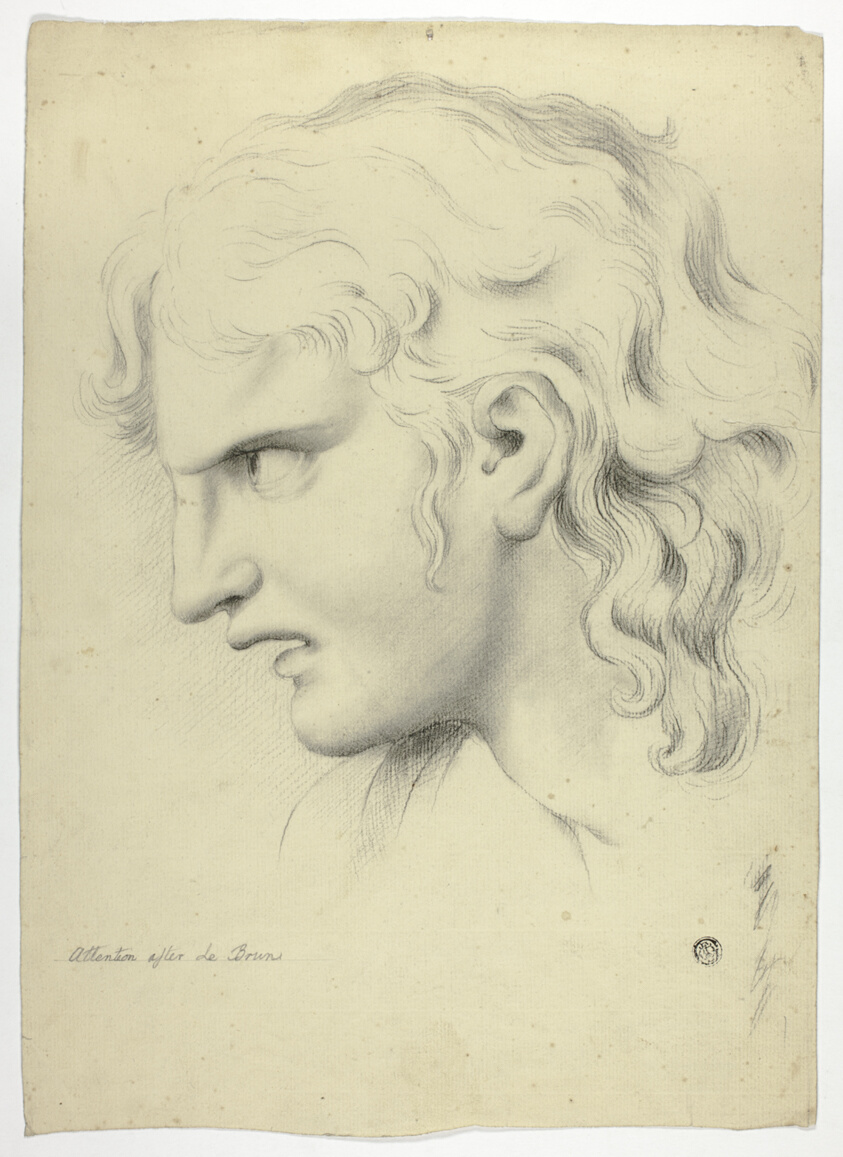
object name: Drawing and Watercolor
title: Attention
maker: John Downman (English, 1750-1824); or after Charles Le Brun (French, 1619-1690)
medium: Charcoal with stumping on cream laid paper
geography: England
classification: charcoal; drawings (visual works); prints and drawing